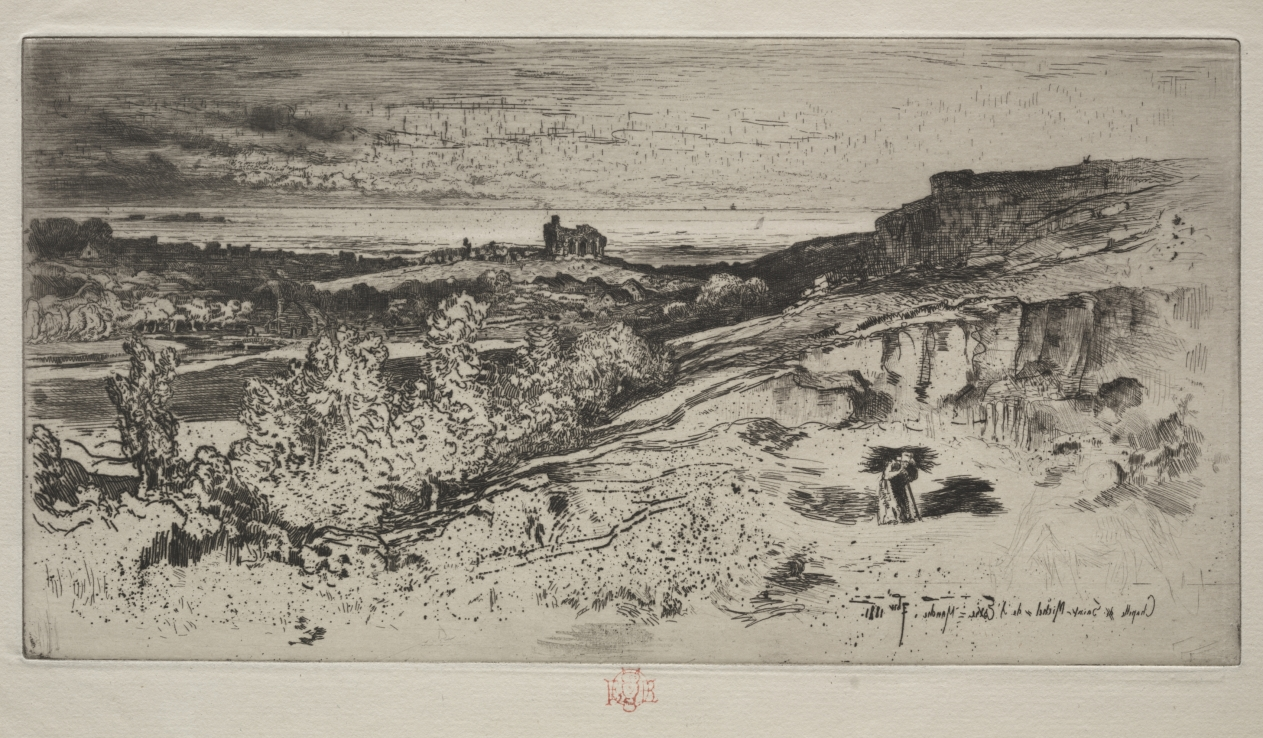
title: The Chapel Saint-Michel at L'Estre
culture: France, 19th century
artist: Félix Hilaire Buhot (French, 1847–1898)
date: 1881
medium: etching, drypoint and roulette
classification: Print